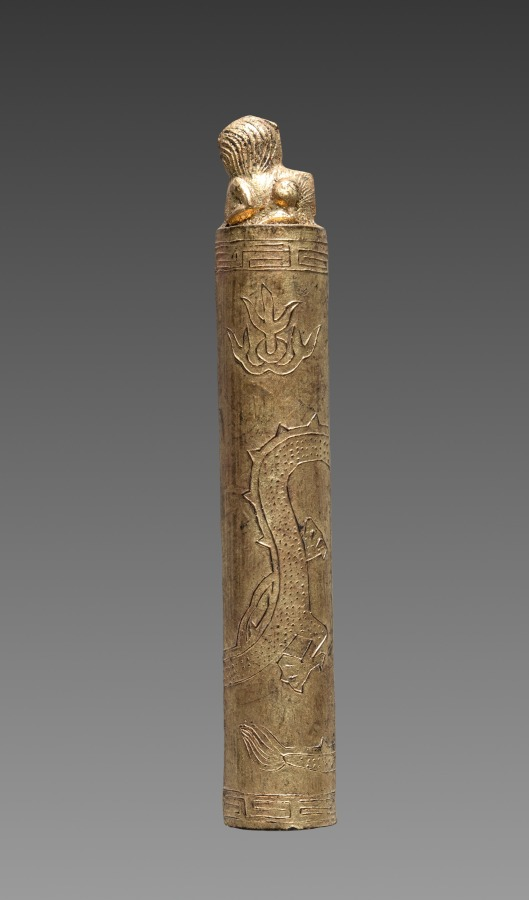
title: Ink Cake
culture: China, Qing dynasty (1644-1911)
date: 1644–1911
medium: ink cake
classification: Miscellaneous